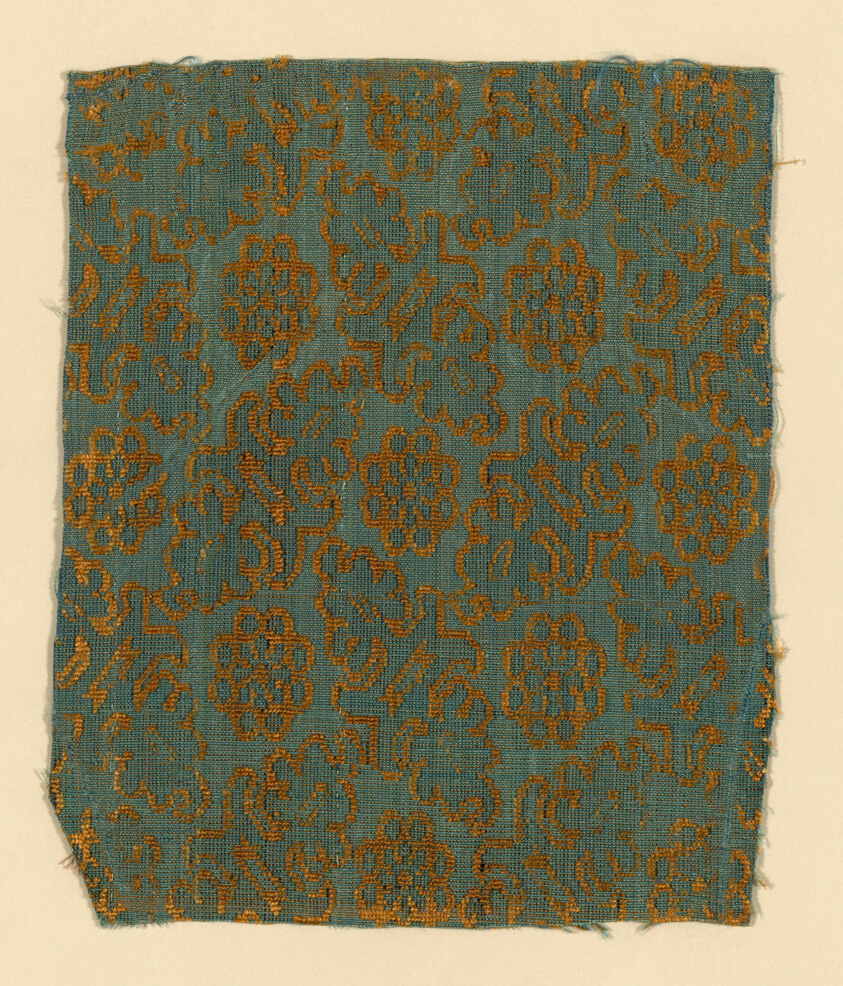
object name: Textile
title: Fragment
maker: Italy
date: 1601/25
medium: Silk, cut, uncut, and voided velvet against plain weave foundation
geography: Italy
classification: textile; weaving - velvet; weaving